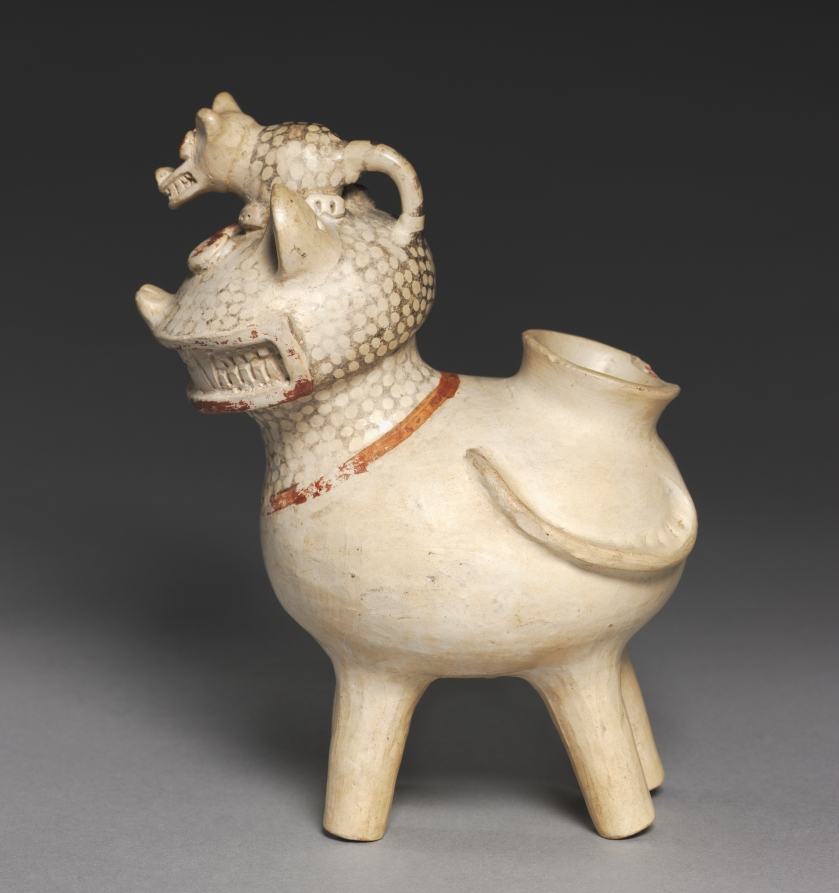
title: Feline Vessel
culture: Central Andes, North Highlands, Recuay people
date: 1–700 CE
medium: ceramic, red and white slips, black pigment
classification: Ceramic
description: Recuay art is under-studied and it is difficult to know the meaning of the wonderfully stylized feline on whose head perches a small passenger that may be a coatimundi, a nosy, busy, racoon-like animal. Elsewhere in Recuay art, felines are shown as virile predators, making it likely that in general they were symbols of leadership. The feline is painted with white and red slips; after firing, a resist application of black pigment was used to create the dotted pattern.